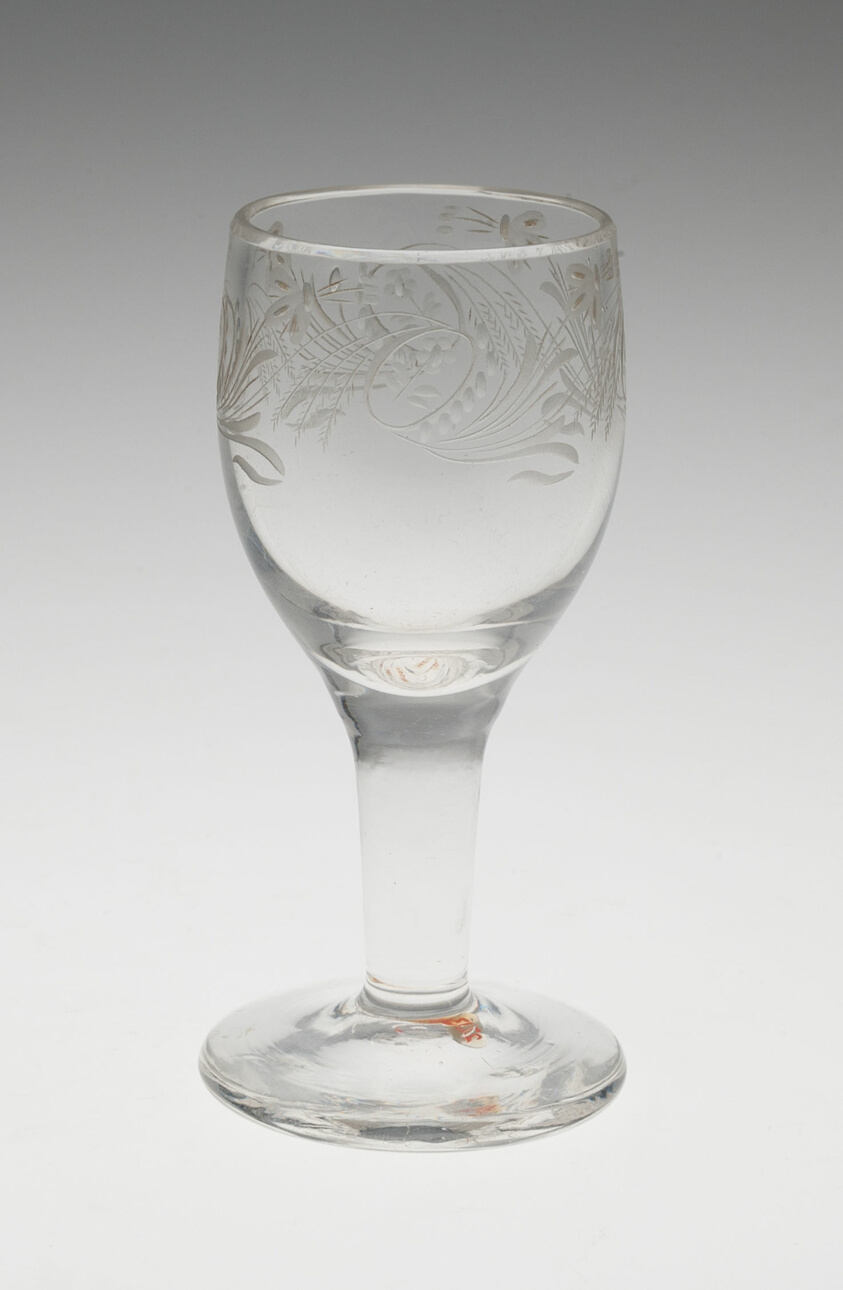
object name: Glass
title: Wine Glass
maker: England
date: Late 18th century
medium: Glass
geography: England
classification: drinking vessel; glass; european decorative arts